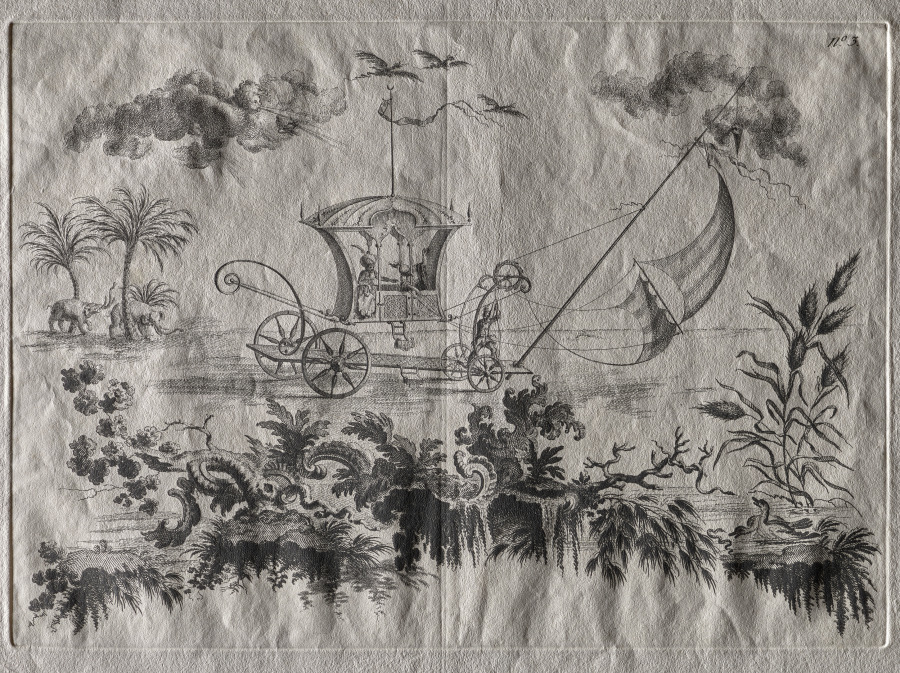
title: The Carriages used on the Moon and which move by sails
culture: Italy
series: Suite of the Most Notable Things Seen by John Wilkins Erudite English Bishop during His Famous Voyage from the Earth to the Moon … dedicated to Sir William Hamilton ambassador to the Court of Naples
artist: Filippo Morghen (Italian, 1730–after 1807)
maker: possibly after Jean-Pierre-Louis-Laurent Hoüel (French, 1735–1813)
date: c. 1769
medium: etching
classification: Print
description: Filippo Morghen’s set of 10 etchings is outstanding among visual narratives of imaginary voyages to the moon, both visual and literary, that intrigued 18th-century European audiences. A title page and nine plates depict the imagined lives and economy of moon dwellers. These include modes of transport such as large birds and sailboats propelled by giant bellows, enormous scissors for capturing wild beasts (including an oversized rat), and the use of giant pumpkins as fishing boats and as dwellings. Representations of the moon dwellers are based on inaccurate and imaginary European interpretations of Asian, Ottoman, and Native American cultures—called chinoiserie and turquerie—that permeated the decorative and visual arts of the period.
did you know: Morghen based this print series on three books dedicated to moon exploration, including Bishop Francis Godwin’s Man in the Moone, 1640.